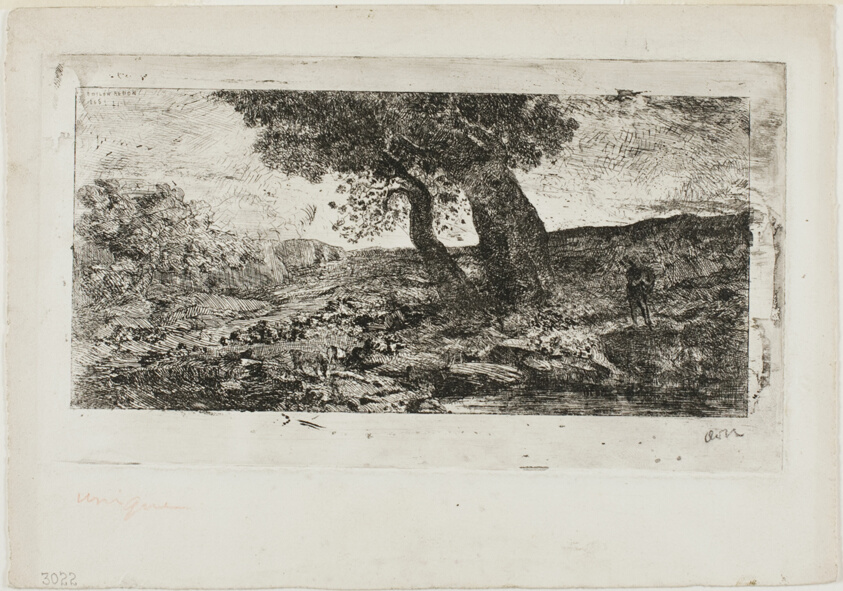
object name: Print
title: In Spain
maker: Odilon Redon (French, 1840-1916)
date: 1865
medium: Etching on off-white wove paper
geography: France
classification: etching; print; prints and drawing; paper